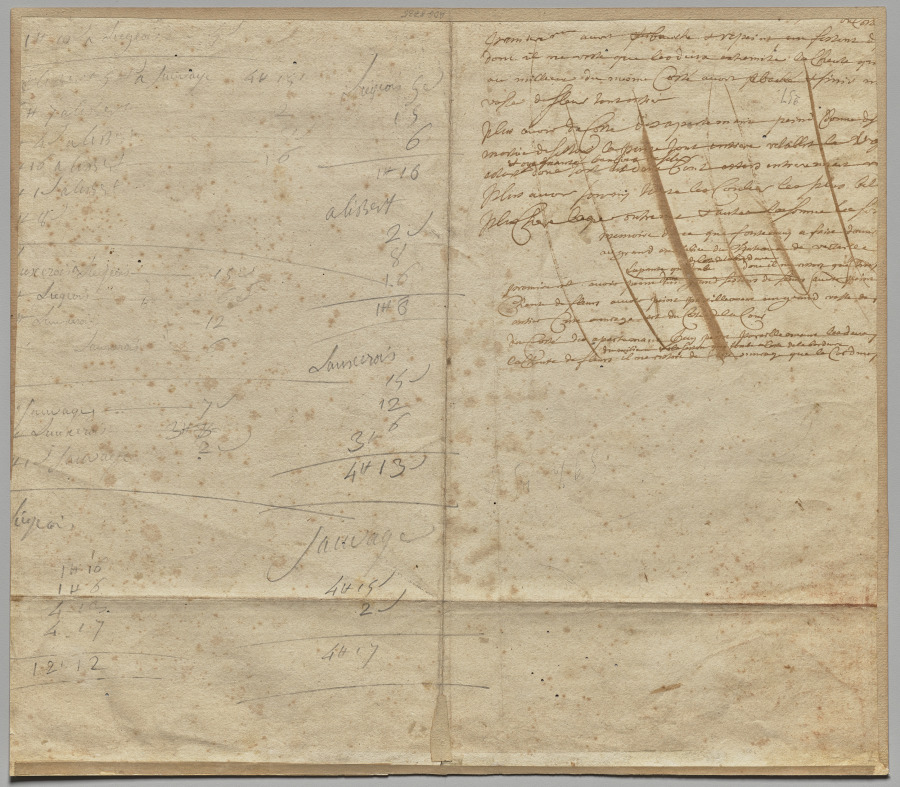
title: Hymn to Venus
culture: France, 18th century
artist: Louis Felix de la Rue (French, 1731–1765)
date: c. 1760–65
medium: Pen and brown ink over red chalk (?) on antique laid paper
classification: Drawing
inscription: verso heavily inscribed in ink and pencil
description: Louis Félix de La Rue came from a family of artists and was best known for creating designs for decorative arts, such as ceramics. This sheet—which features putti and bacchantes, the artist’s preferred subjects—likely served such a purpose, given its allover composition and focus on patterning and symmetry.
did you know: The verso of this drawing is covered in the artist’s calculations and notations, suggesting that he reused a sheet found in his studio to create it.